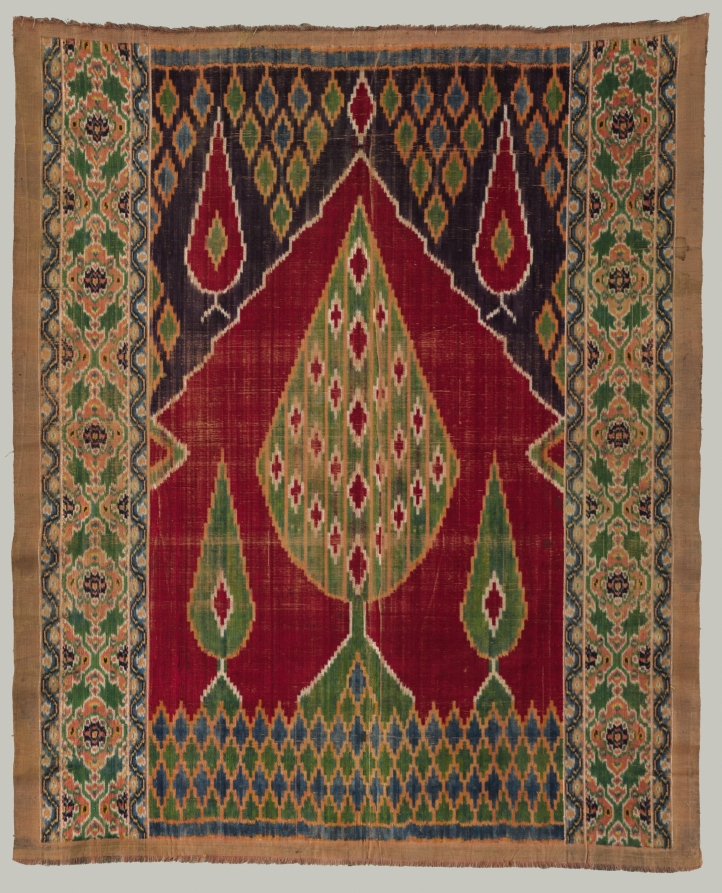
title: Door curtain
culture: Iran, Qajar period (1779-1925)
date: 1800s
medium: velvet ikat: silk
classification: Velvet